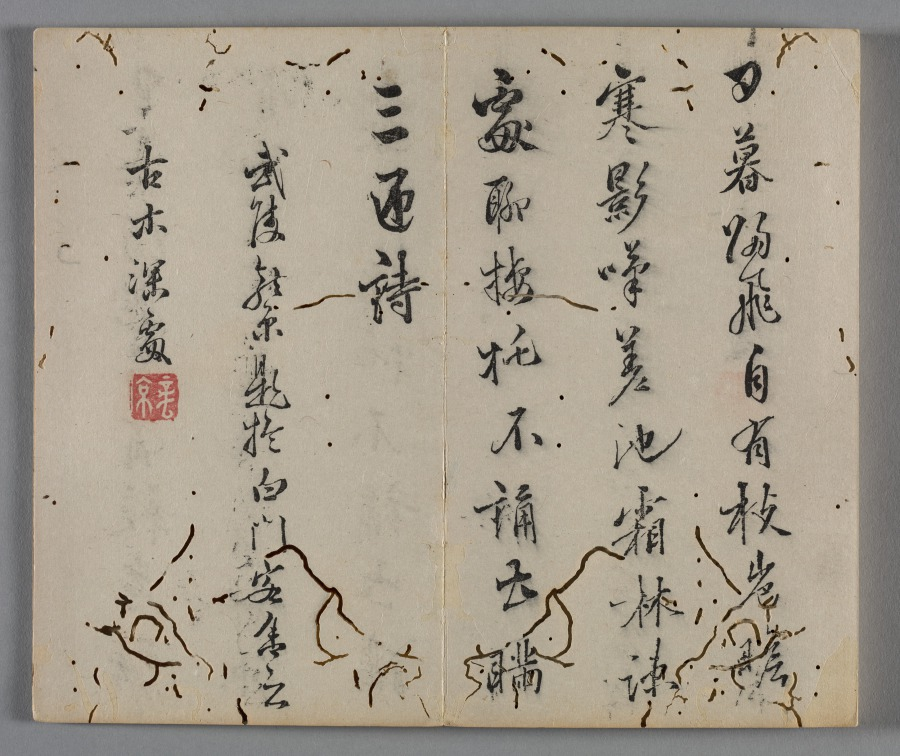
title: Ten Bamboo Studio Painting and Calligraphy Handbook (Shizhuzhai shuhua pu): Birds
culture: China, Qing dynasty (1644-1911)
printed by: Hu Zhengyan (Chinese, c. 1584–1674)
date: 1633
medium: Woodblock-printed book; ink and colors on paper; first edition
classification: Print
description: Color printing reached a level of perfection in the early 1600s, as seen in this Ten Bamboo Studio Collection of Calligraphy and Painting and the Mustard Seed Garden Manual of Painting (printed 1679 and 1701). The painterly quality, precision in registering (aligning) the woodblocks, and harmonious colors made them the most successful color print editions in Chinese history. Both editions were printed and compiled in Nanjing, spread nationwide, and had a great impact on the arts in Japan and Korea.